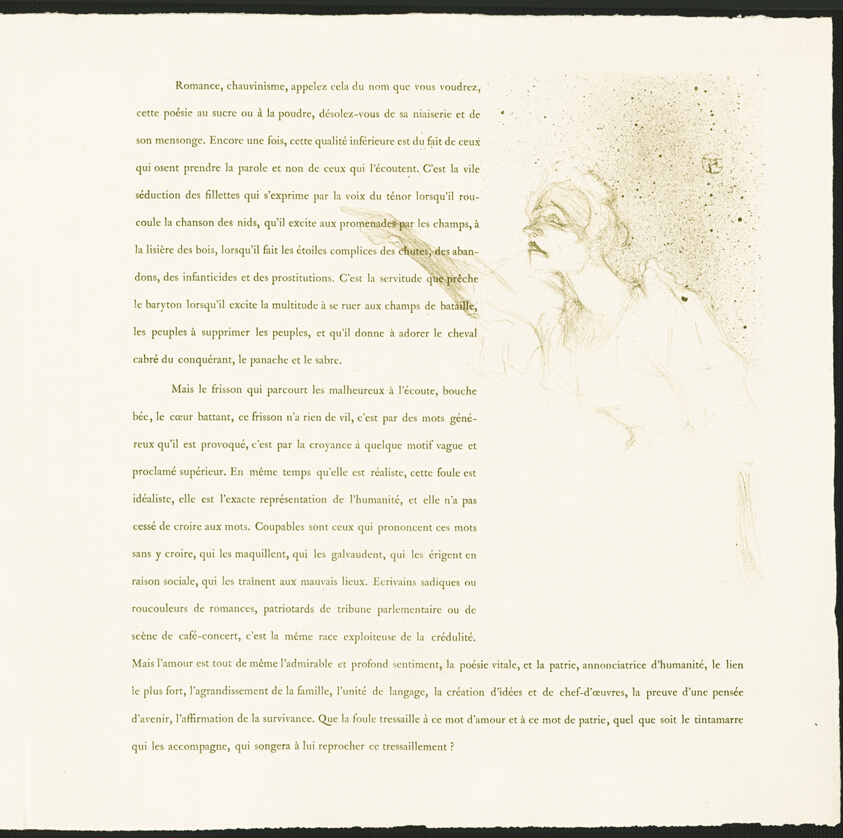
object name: Print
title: Yvette Guilbert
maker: Henri de Toulouse-Lautrec (French, 1864-1901)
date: 1894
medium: Color lithograph, with letterpress, on ivory laid paper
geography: France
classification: lithograph; print; prints and drawing